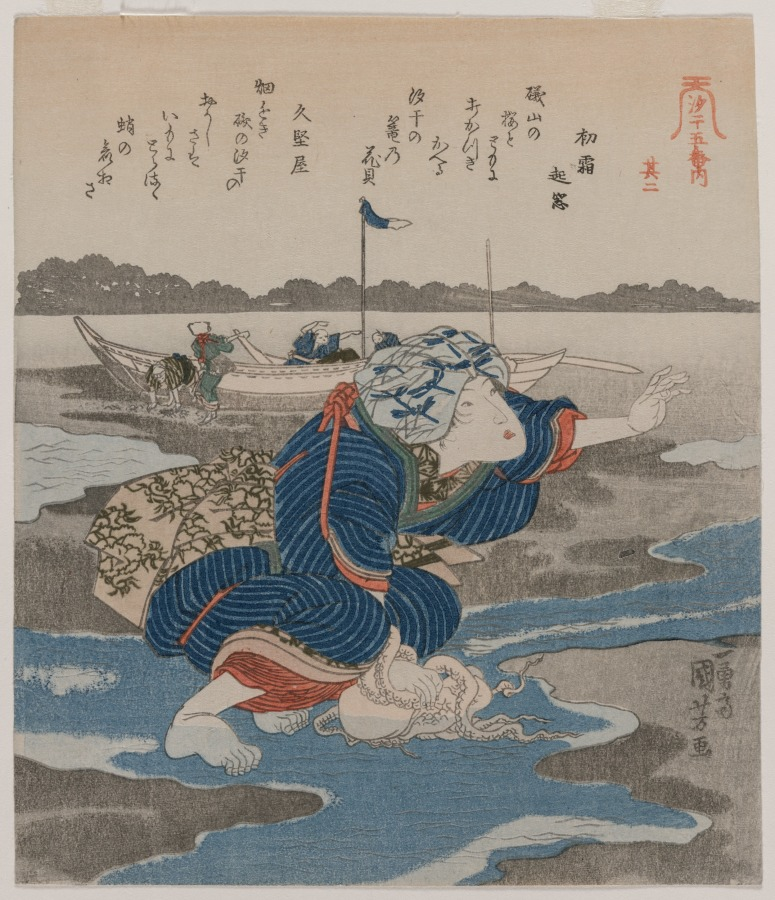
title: Second Print from A Low Tide Pentaptych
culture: Japan, Edo period (1615–1868)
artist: Utagawa Kuniyoshi (Japanese, 1797–1861)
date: c. 1830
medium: color woodblock print from a pentaptych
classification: Print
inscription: Signature: Ichiyusai Kuniyoshi ga.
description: This is one of five surimono, privately commissioned prints, making up an image of people collecting sea life at low tide. Ten witty poems, written by members of a poetry circle, appear across the upper part of the composition, with two poems on each print. Based in Edo (now Tokyo), the group was led by Hisakataya Misora (active 1810s–30s), who wrote four of the poems. This composition may have been printed in April, which was considered the best time for beachcombing.